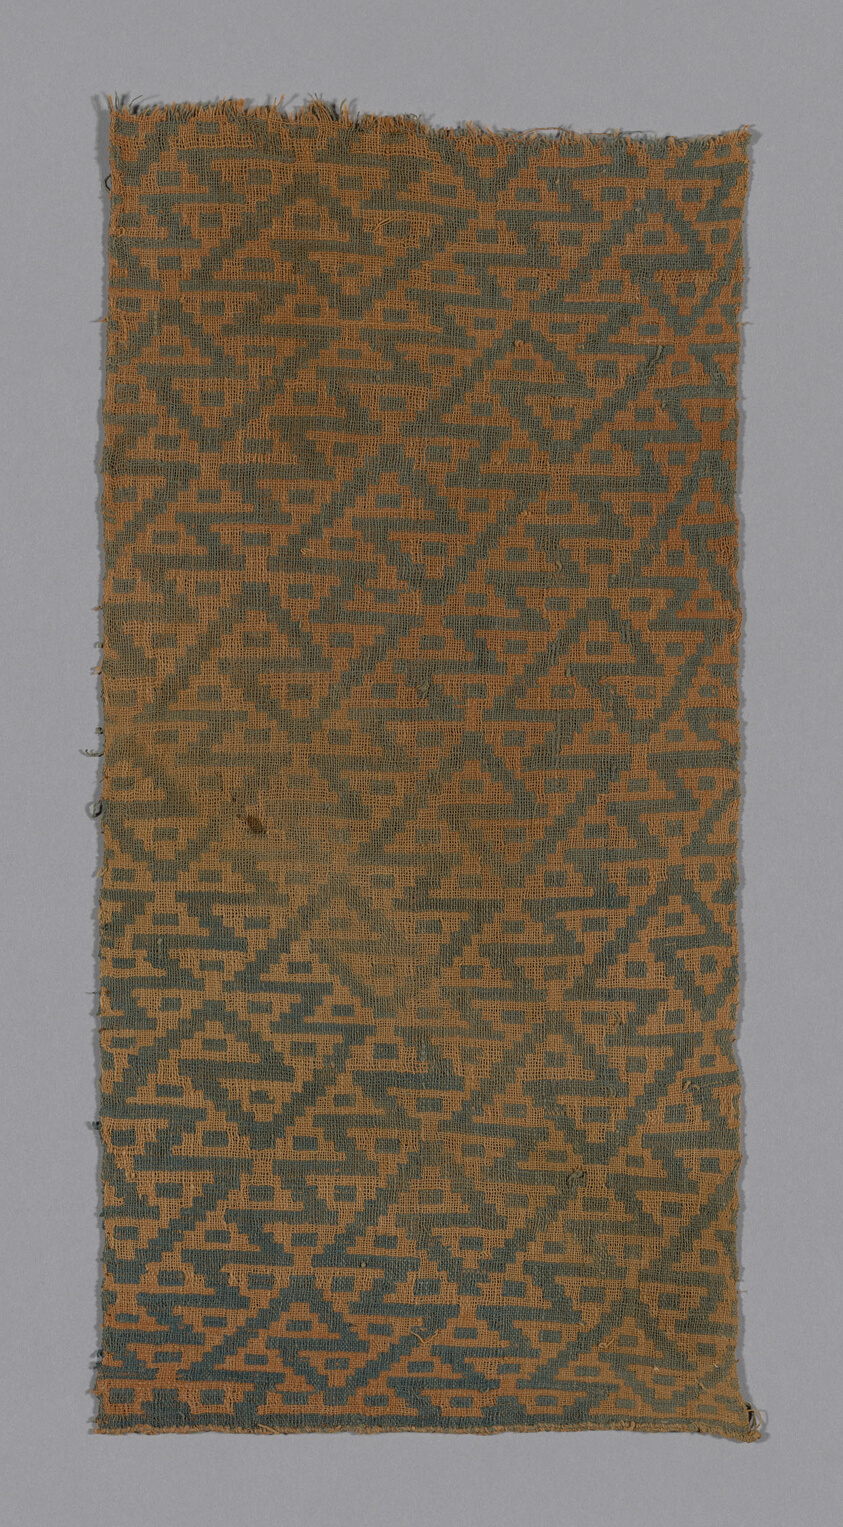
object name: Textile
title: Fragment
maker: Peru, south coast, Palpa Valley, Chiquerillo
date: A.D. 1000/1476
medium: Cotton, plain weave, double cloth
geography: Peru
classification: textile; weaving